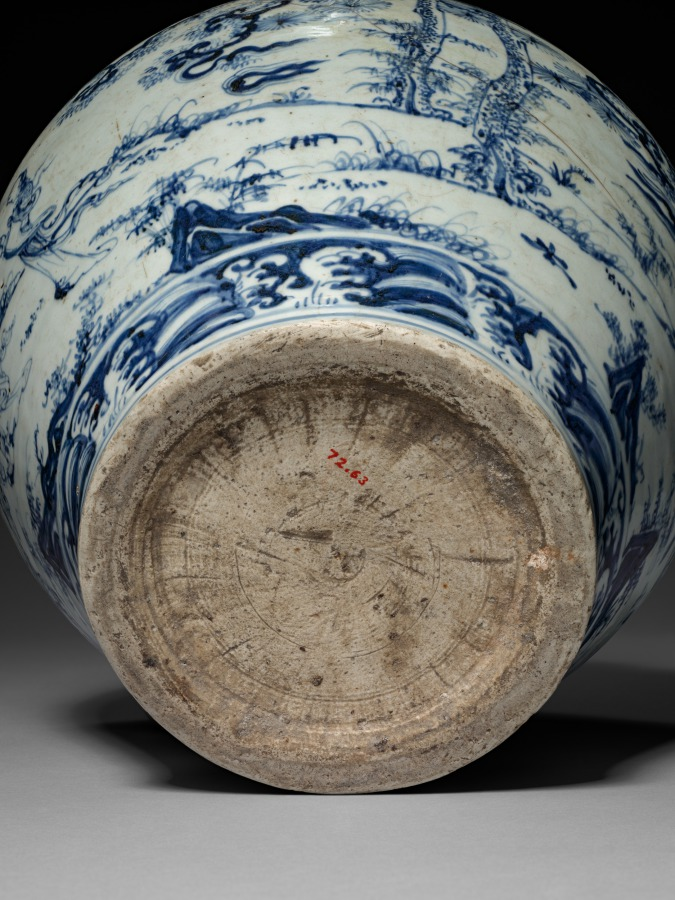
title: Jar with Scenes from the Land of Daoist Immortals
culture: China, Ming dynasty (1368–1644)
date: early 1400s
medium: porcelain with underglaze blue decoration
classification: Ceramic